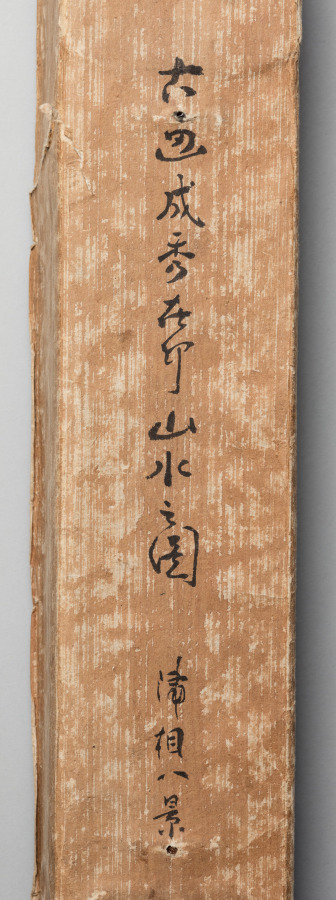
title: Landscape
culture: Japan, Muromachi period (1392–1573)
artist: Narihide (Japanese, active 1500s)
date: 1500s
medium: hanging scroll; ink on paper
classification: Painting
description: This composition includes imagery from the Eight Views of the Xiao and Xiang Rivers. Scanning the composition from top to bottom, at least six of the views are discernible: night rain over Xiao and Xiang, evening bell from a mist-shrouded temple, returning sails off a distant shore, geese descending to a sandbar, mountain village in clearing mist, and sunset glow over a fishing village. Inside the painting’s box is a document with a long inscription by prominent calligrapher, collector, and connoisseur Maeda Kōsetsu (1841–1916) discussing the painting’s subject and the matter of the painter’s biography—he appears to have been a Kano school artist, but his precise identity is unclear.